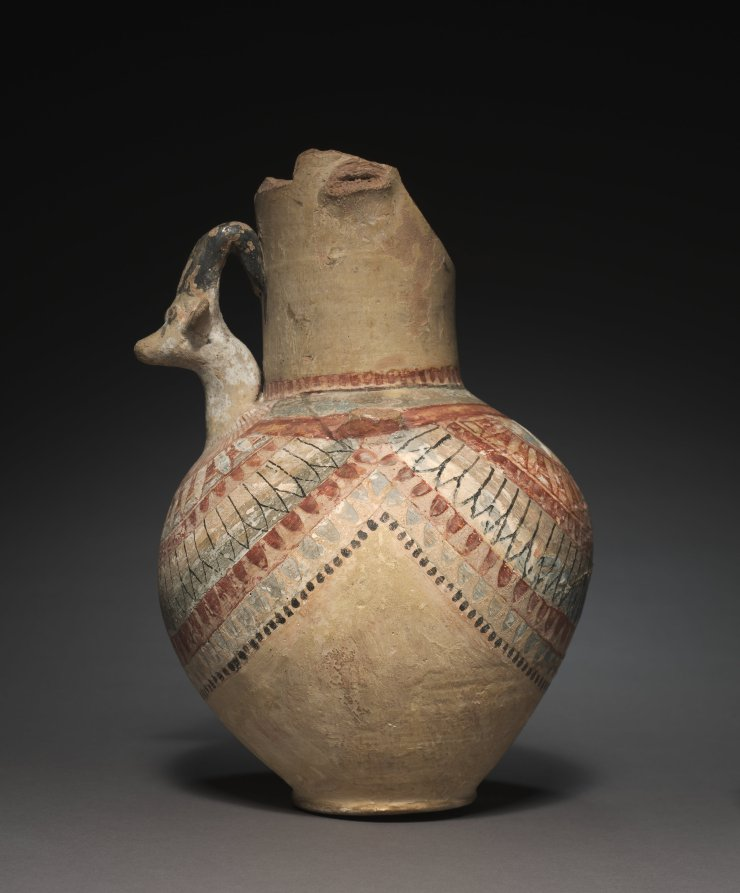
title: Decorated Amphora with Ibex Head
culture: Egypt, Modern pastiche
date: before 1920 this is common era, not BCE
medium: marl clay ware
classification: Vessels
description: A splendid example of the decorated pottery known as "palace ware," made only in Dynasty XVIII. It is painted with garlands imitating the real flowers with which vessels were draped at banquets. This vase was found in the palace of Amenhotep III at southern Thebes.